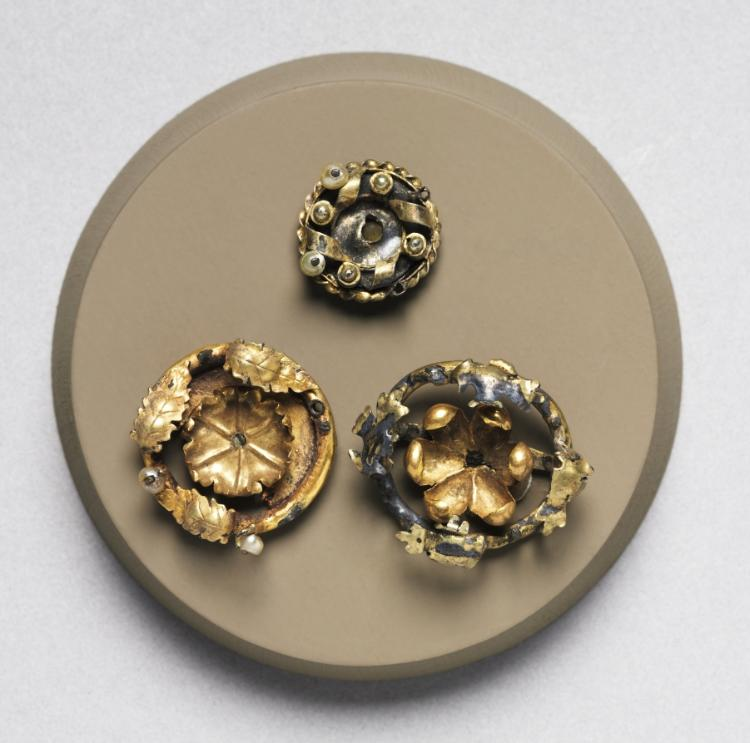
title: Brooch (Element of Garment Clasp)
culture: France, Paris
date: c. 1400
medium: gold, gilt silver and pearls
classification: Jewelry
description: During the 1300s, brooches like this were ordinarily worn at the neck to clasp a lady's cloak or dress. They could also be sewn into a garment or hat as an ornament.